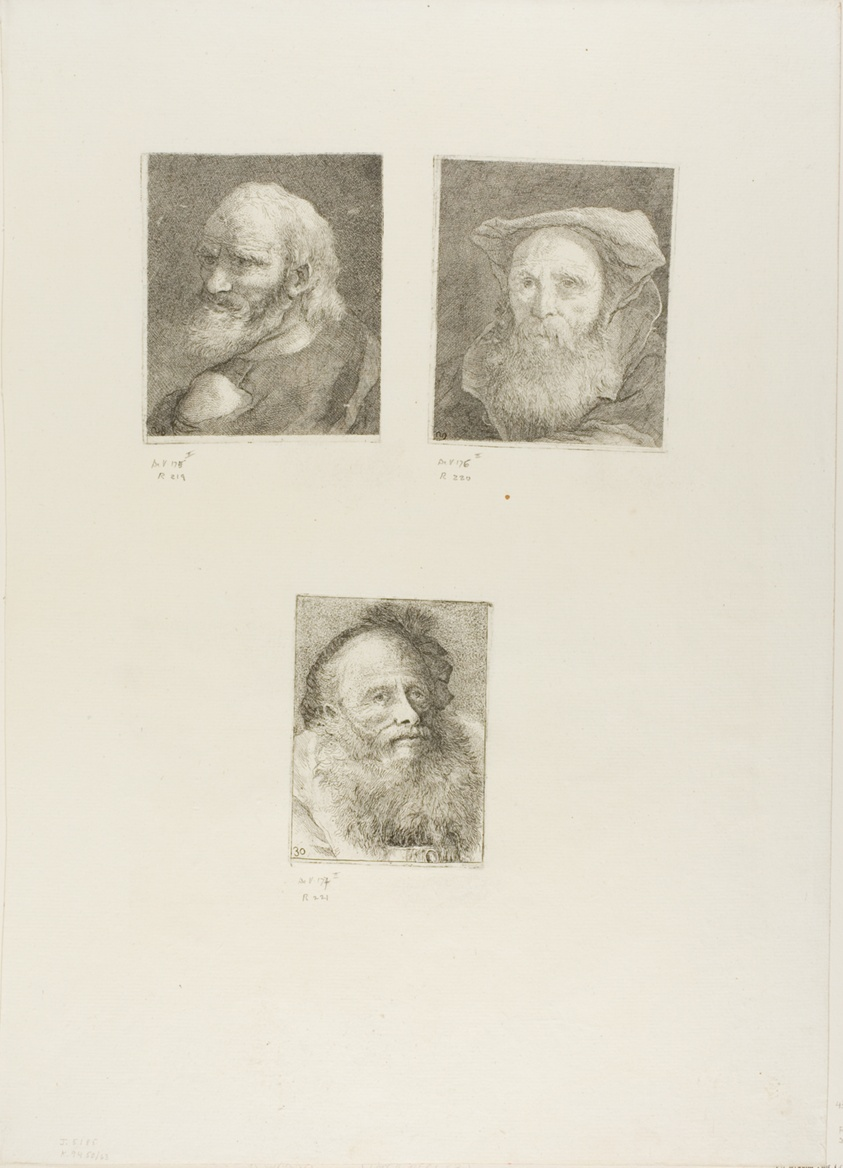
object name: Print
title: Old Man with a Beard, Bearded Old Man with a Hat, Old Man with Decorative Cap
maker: Giovanni Domenico Tiepolo (Italian, 1727-1804)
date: 1775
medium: Four etchings on ivory laid paper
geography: Italy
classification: etching; print; prints and drawing